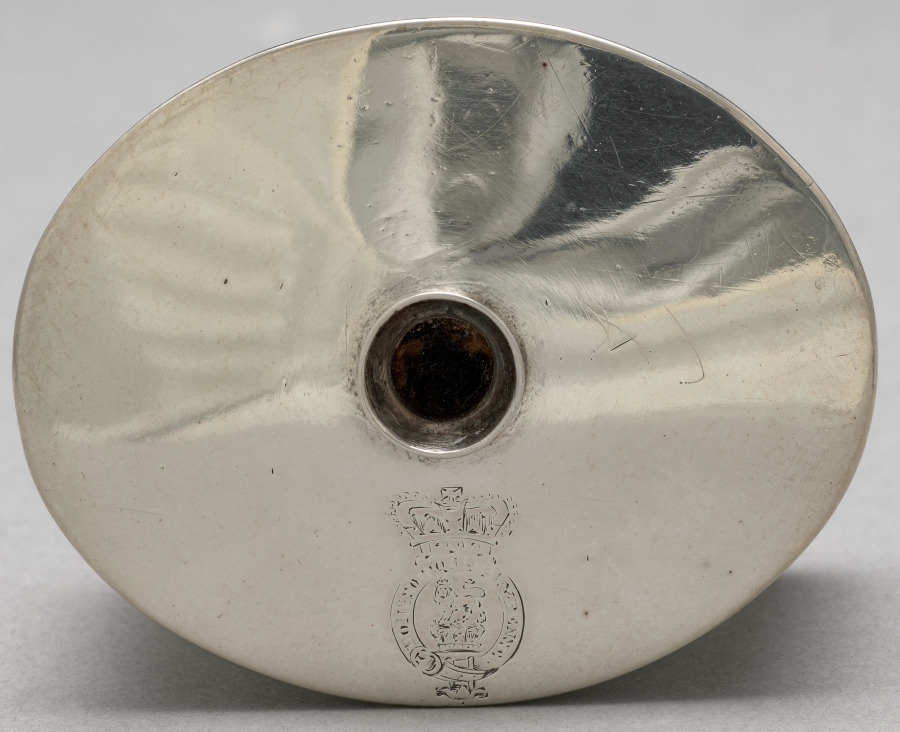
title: Cover for a Hot Water Jug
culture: England, early 19th century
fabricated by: John (British) Edwards (British)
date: 1800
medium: silver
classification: Silver